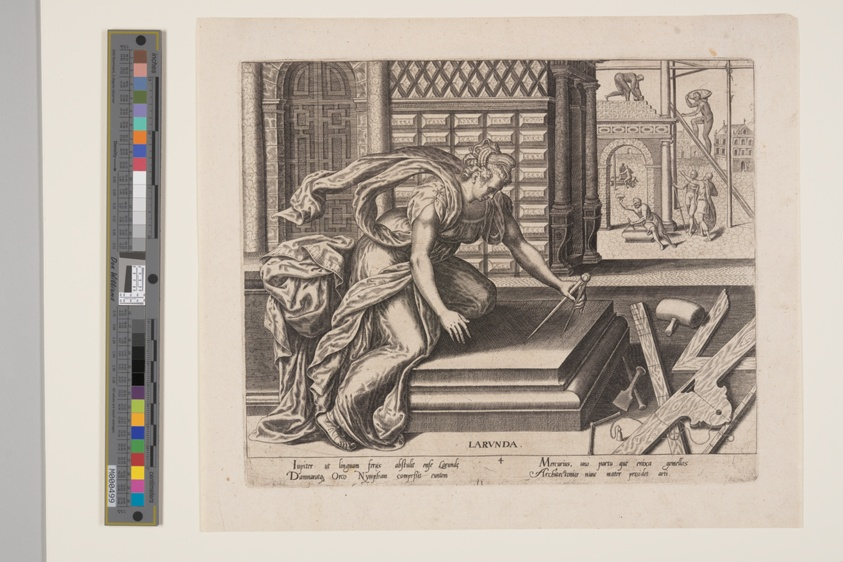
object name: Print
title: Larunda, from The Occupations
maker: Philip Galle; Flemish, 1537–1612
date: 1574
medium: Engraving on ivory laid paper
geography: Flanders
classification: engraving; paper; print; prints and drawing